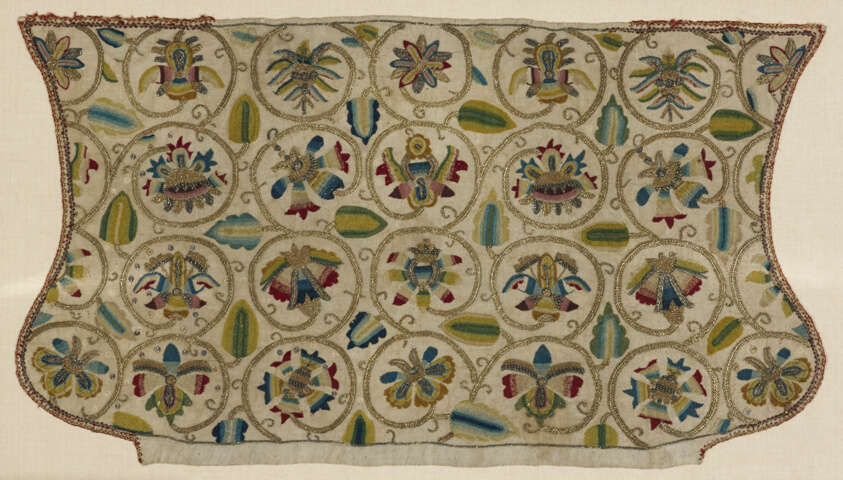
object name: Textile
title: Coif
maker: England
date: c. 1600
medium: Linen(?), plain weave; embroidered with silk floss and gilt and silvered-metal-strip-wrapped thread in detached buttonhole, buttonhole filling, stem, chain, ladder, threaded back (Italian link), Holllie, and Ceylon variation stitches; plaited braid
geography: England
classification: needlework (visual works); needlework - costume; textile